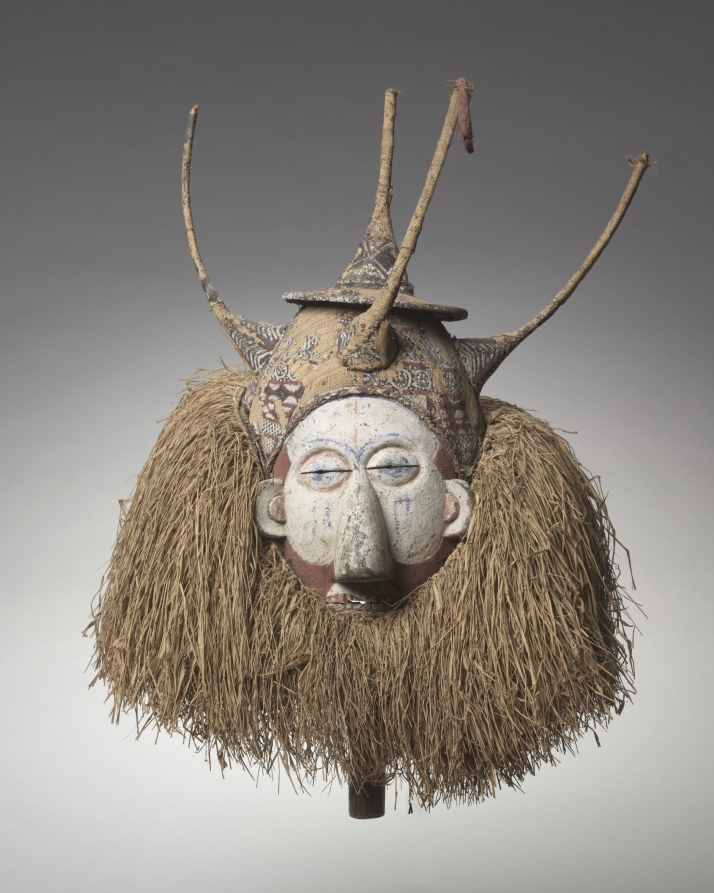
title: Mask (ndeemba)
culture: Africa, Central Africa, Democratic Republic of Congo, Yaka-style carver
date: early 1900s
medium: Wood, raffia, paint, and cotton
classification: Mask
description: This Mask (Ndeemba) has been featured prominently in the African galleries since making its debut at the Cleveland Museum of Art in 1962. Dated to the 1900s, the object is part of a group of eight masks that appear at the end of the circumcision and puberty ritual (n-khanda) for Yaka boys. It would have marked the new status of the boys who became men and commemorated their re-entry into the village. Affirming age-long tradition, such masks are worn by the master of the initiation or by the newly initiated himself.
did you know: Look under the fluffy layers of raffia fiber to see the handle; this mask was "worn" by holding it up to the face.